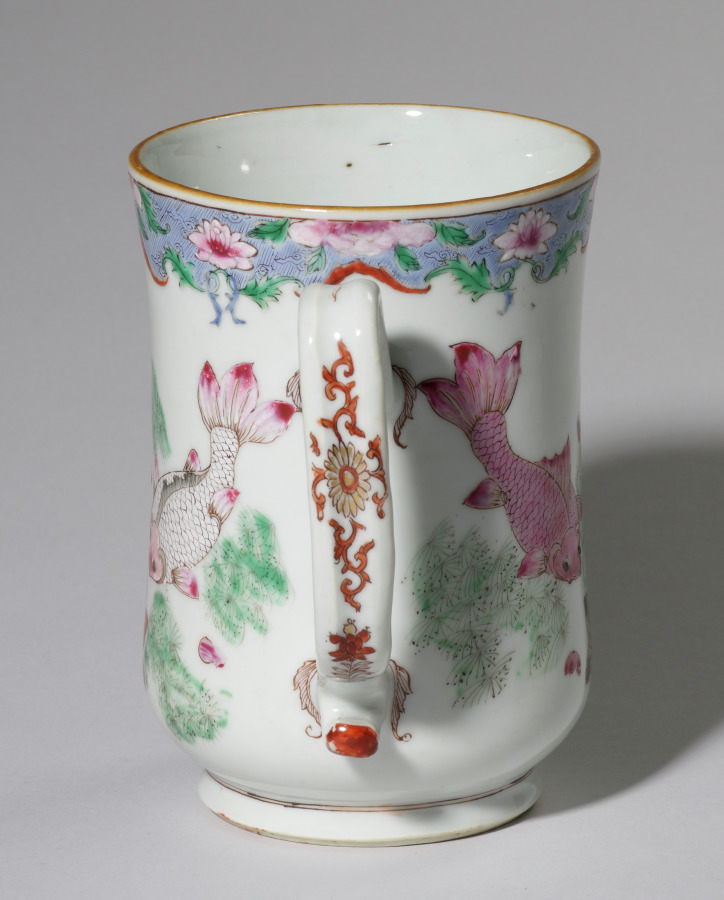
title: Mug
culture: China, Chinese Export -- European Market, 19th century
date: c. 1800–1825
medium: porcelain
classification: Ceramic